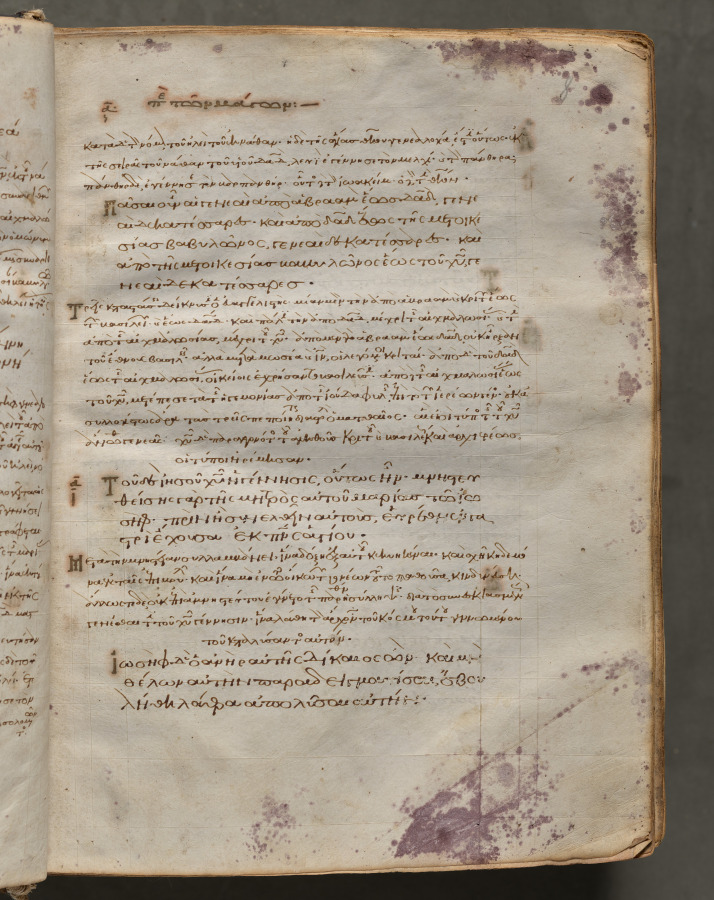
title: Text, folio 8 (recto), from a Gospel Book with Commentaries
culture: Byzantium, Constantinople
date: c. 1000–1100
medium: ink, tempera, and gold on vellum; leather binding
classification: Bound Volume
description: Each of the four gospels in this book opens on a page with brilliantly illuminated borders depicting the author of the text as well as birds-principally peacocks, symbols of the immortality of the soul-and fountains, representing the fountain of life and the salvation of the soul. This volume consists of 428 leaves with texts in Greek. Its level of sophistication suggests that it was probably written and decorated in a monastery in Constantinople.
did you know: Gospel Books were carried in procession through Byzantine churches.